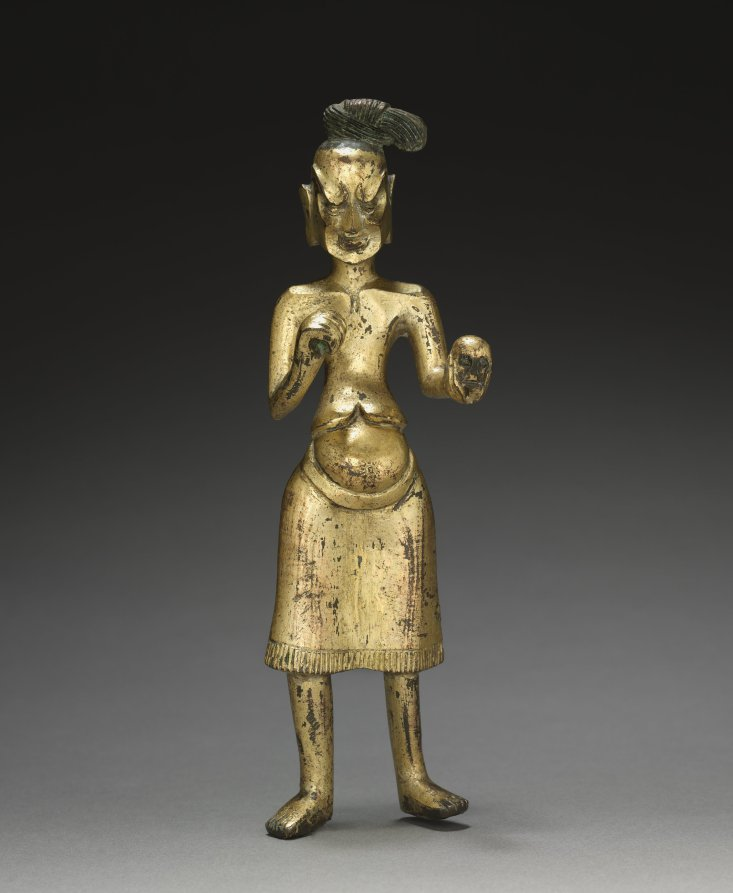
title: Ascetic Holding a Skull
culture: China, Northern Wei dynasty (386-534)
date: c. 500 CE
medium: gilt bronze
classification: Sculpture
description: The figure holding the skull has been identified as Mrgasirsa, who sought Buddha’s teaching on how to determine the karma and transmigration of the arhats. Mrgasirsa appears with Vasistha in some of the wall paintings of the Mogao grottoes in Dunhuang.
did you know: This grimacing figure has a potbelly protruding between the hem of his short jacket and fringed skirt (dhoti).